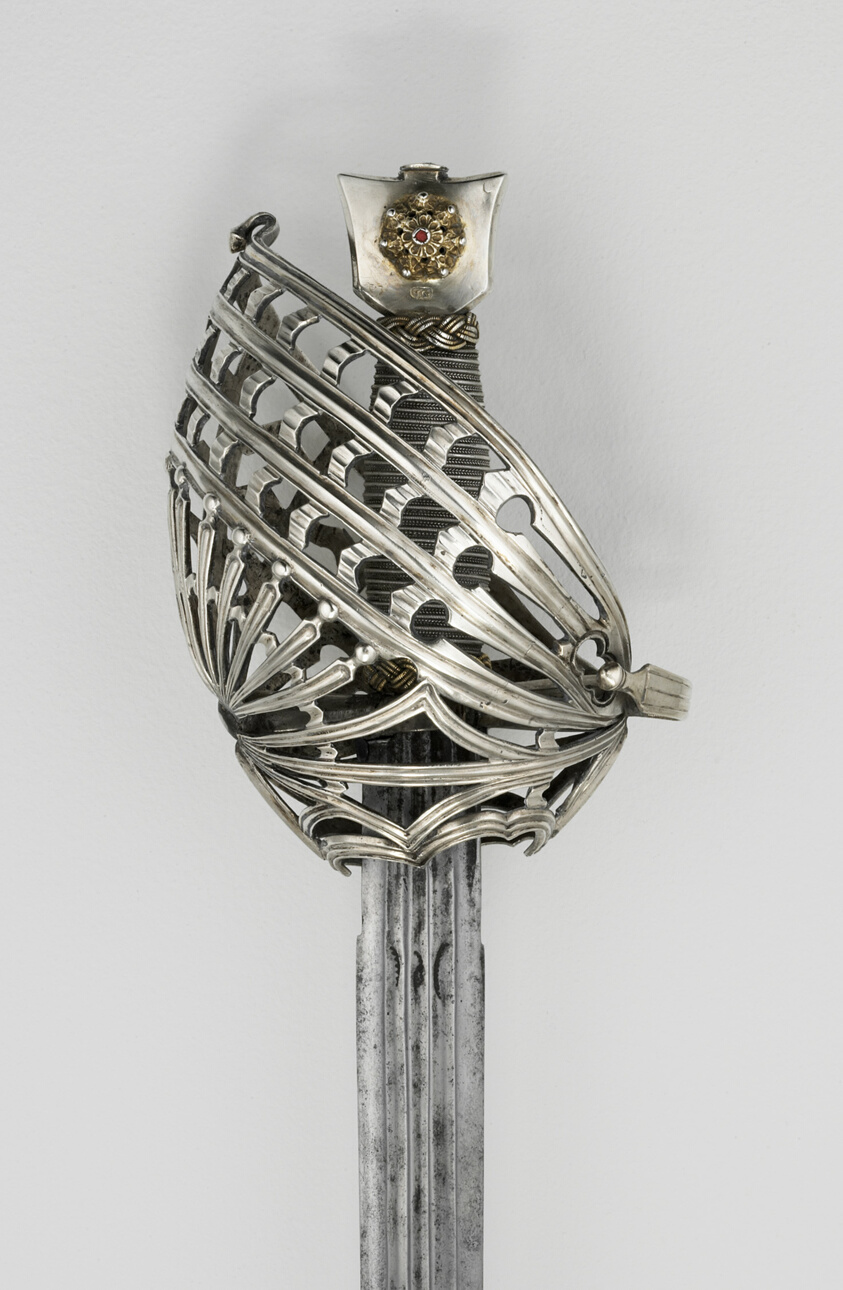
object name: Arms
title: Basket-Hilted Broadsword (Schiavona)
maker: Italian; Venice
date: 1775/1800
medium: Steel, silver, wood, and coral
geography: Venice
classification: edged weapon-sword; arms; arms and armor